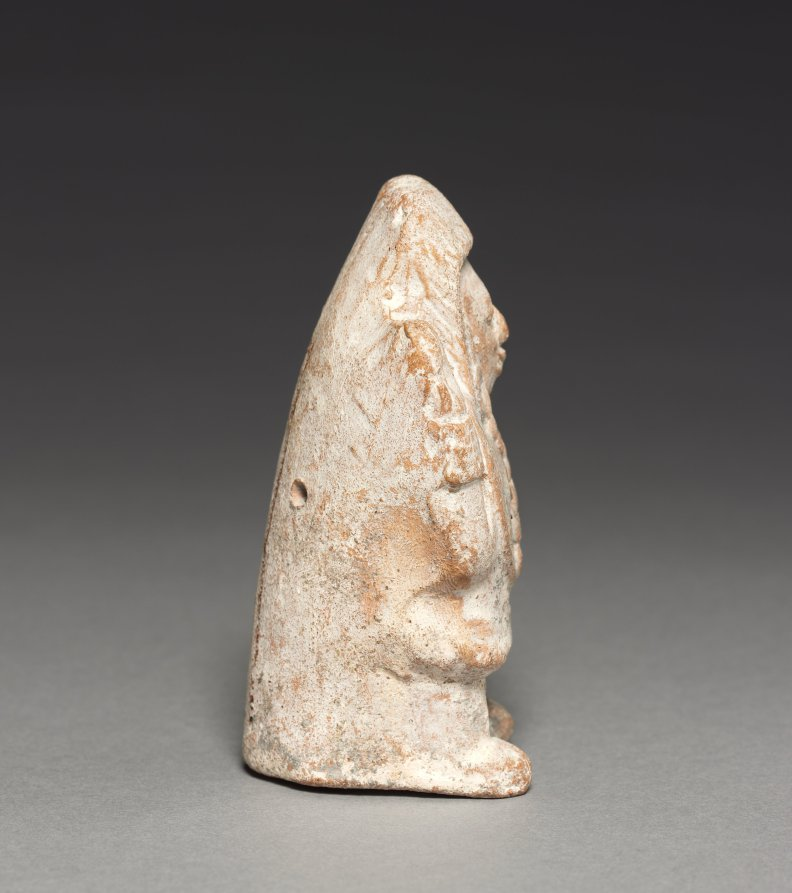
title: Female Figurine Rattle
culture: Mexico, Campeche, Jaina Island, Maya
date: 600–900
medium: Ceramic, pigment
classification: Sculpture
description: This hollow, mold-made figurine contains pellets that transform it into a rattle used as a musical instrument, perhaps during household rituals.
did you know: This hollow, mold-made figurine contains pellets that transform it into a rattle.